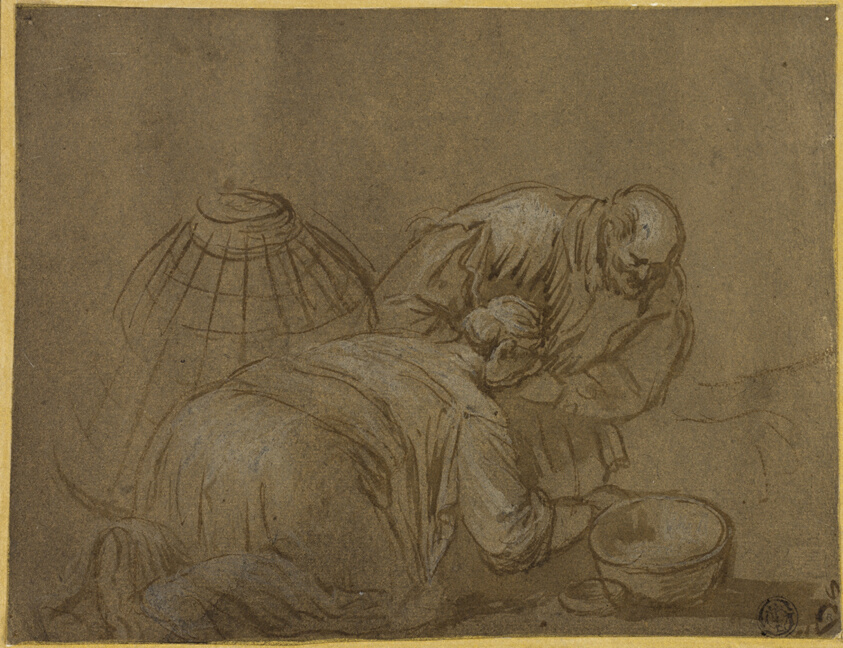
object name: Drawing and Watercolor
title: Peasant Couple Looking in a Basket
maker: After Jacopo Bassano; Italian, c. 1510-1592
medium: Pen and brown ink, heightened with lead white (partially oxidized), on laid paper prepared with brown wash, laid down on ivory laid paper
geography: Italy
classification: pen and ink drawings; drawings (visual works); prints and drawing